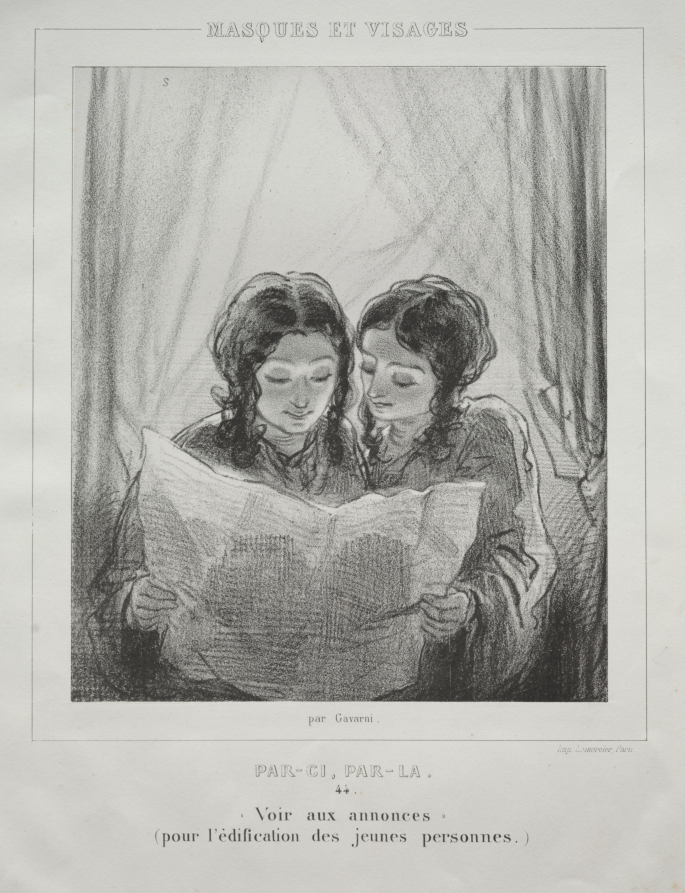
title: Masques et Visages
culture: France, 19th century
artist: Paul Gavarni (French, 1804–1866)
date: c. 1853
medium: lithograph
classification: Print